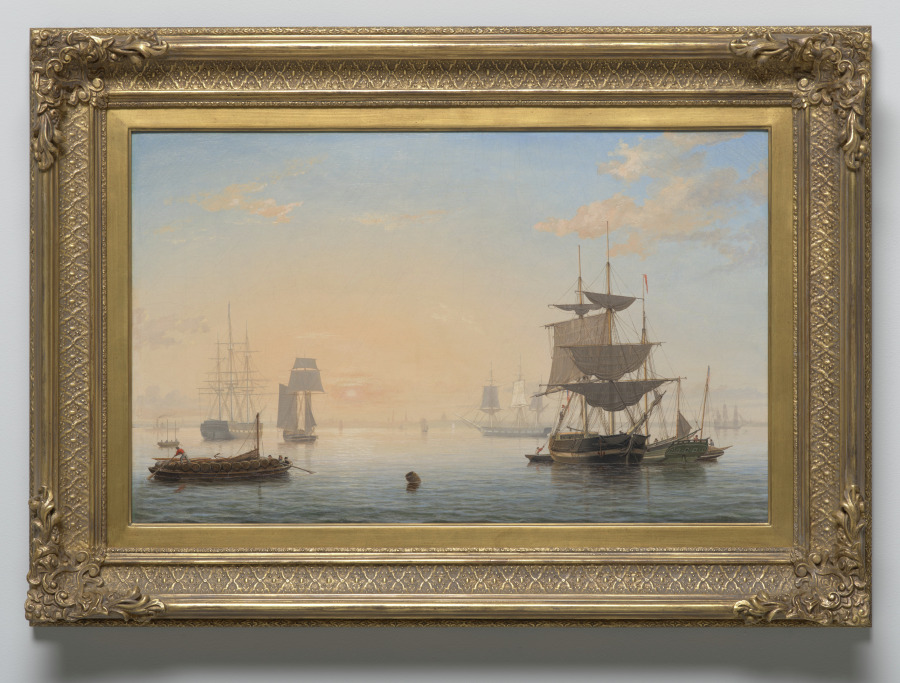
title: Harbor of Boston, with the City in the Distance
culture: America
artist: Fitz Henry Lane (American, 1804–1865)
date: c. 1846–1847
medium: oil on canvas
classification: Painting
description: In this late afternoon view of Boston Harbor, Lane masterfully evoked the diffuse quality of sunlight reflecting off water. The artist was a son of a shipbuilder, so perhaps it is not surprising that his renderings of ships and their intricate riggings are painstakingly accurate. On the far left side of the painting, evolving technology appears in the guise of a steamboat, which ferried passengers between Boston and Gloucester.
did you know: For a long time, art historians mistakenly thought the artist’s middle name was Hugh.